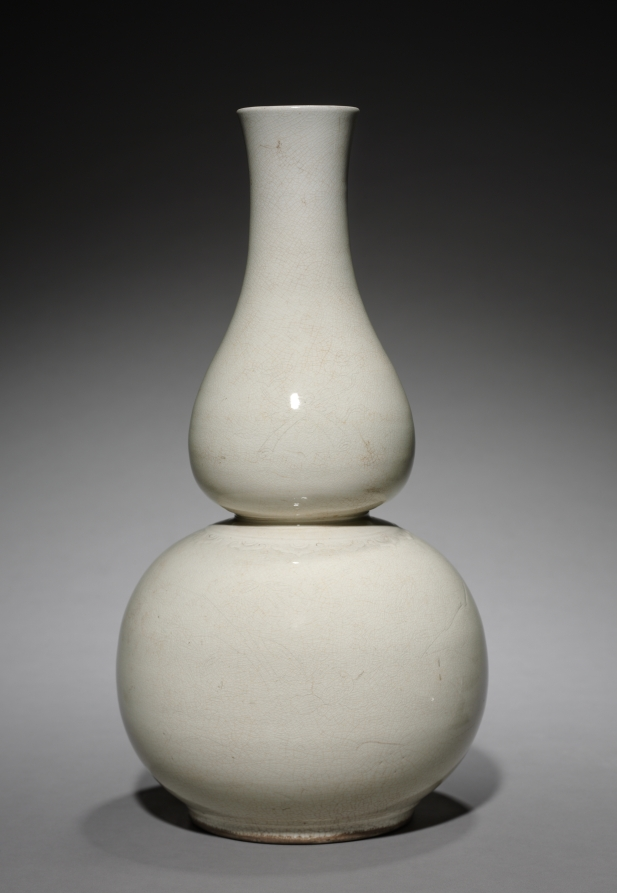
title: Double Gourd-shaped Bottle: Ding ware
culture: China, Ming dynasty (1368–1644)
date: 1368–1644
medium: porcelain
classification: Ceramic